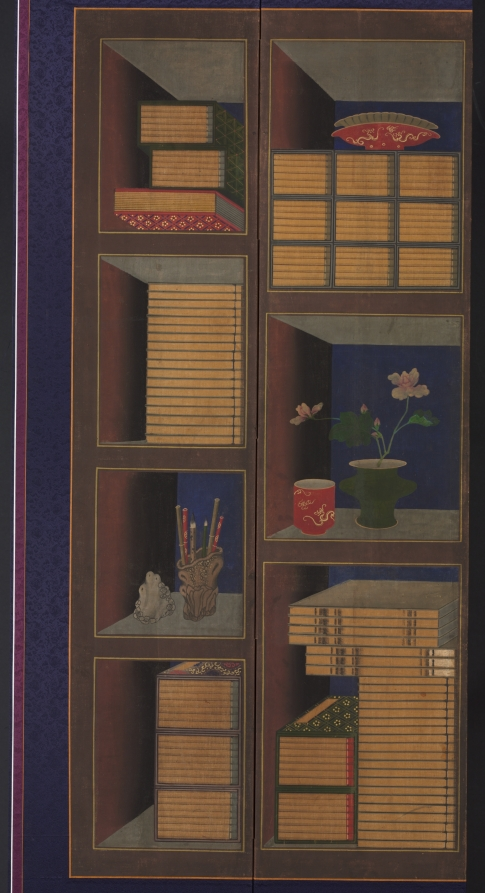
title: Books and Scholars’ Accoutrements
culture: Korea, Joseon dynasty (1392–1910)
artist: Yi Taek-gyun (Korean, 1808–after 1883)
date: late 1800s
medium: ten-panel folding screen; ink and color on silk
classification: Painting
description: First produced around the second half of the eighteenth century, chaekgado (literally, “pictures of bookshelves”) flourished throughout the 1800s as a royal emblem. And soon this pictorial genre became a popular furnishing item for aristocrats' elegant studies. The third panel from the right bears a hidden seal that reveals the artist: Yi Taek-gyun, a prominent court artist active in the late 1800s.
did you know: A convincing hypothesis that connects the Korean chaekgado tradition with the Renaissance tradition of illusionistic studiolo through the technique of trompe-l'œil and Chinese Qing period treasured cabinet paintings was first made in Park Shim-eun's thesis (2002).